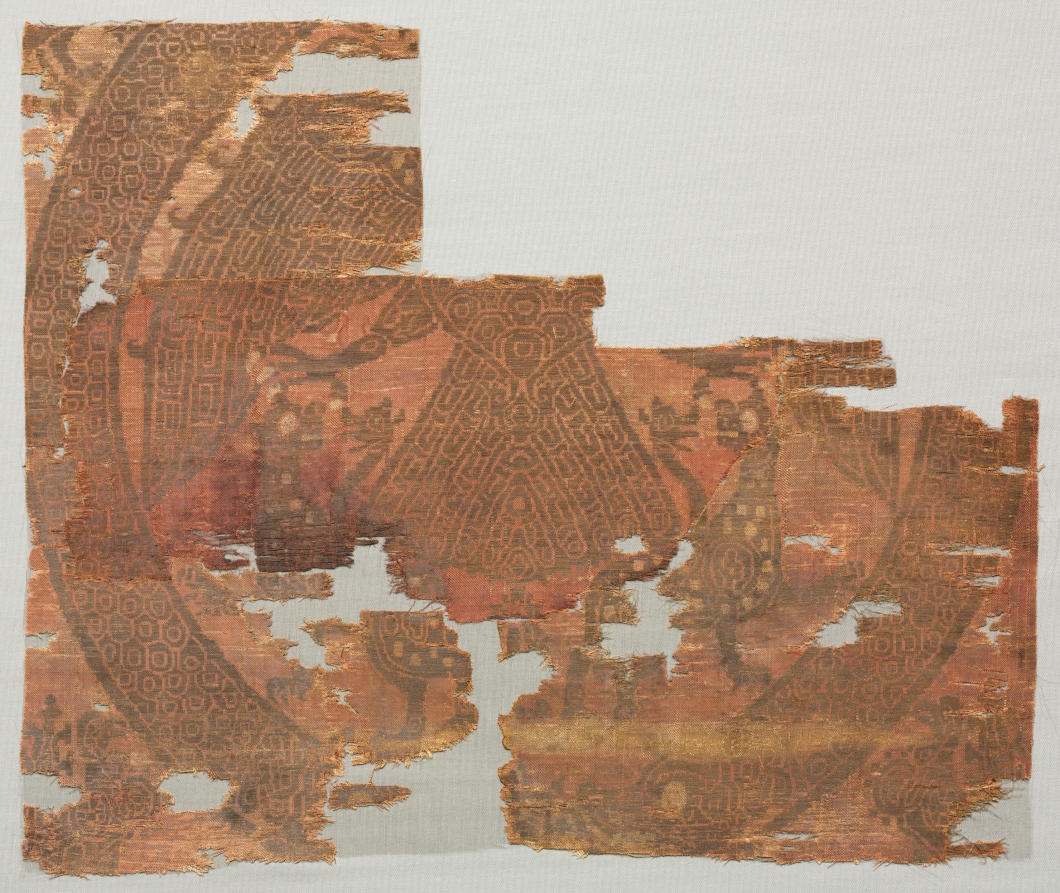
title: Fragment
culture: Byzantium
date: 900s–1000s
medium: Silk and gold: compound twill, brocaded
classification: Textile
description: The design of this textile offers an interesting iconographic puzzle. The double-headed eagle was a common motif in the art of the Near East in ancient times and from there seems to have found its way into Byzantine and European art. The animal tail ending in an animal's head is also found in Near Eastern art and is particularly noted in textiles of the Seljuk period (1000s–1100s) in Persia. However, the division of the roundel frame into two halves ending in animal heads is not known in the art of the Near East nor is the continuous knot motif which occurs just behind the animal head of the frames. Both of these motifs are familiar in the art of the Anglo-Saxon, Germanic, and Scandinavian peoples of Europe.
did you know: The entire pattern is in gold thread, except for such minor details as claws and eyes which are in golden tan silk on a rose-red ground.